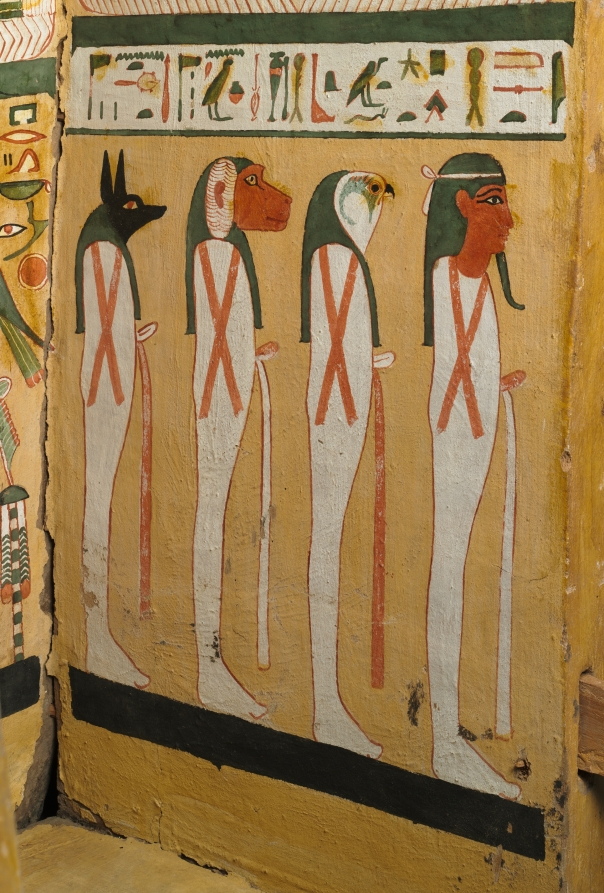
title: Coffin of Bakenmut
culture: Egypt, Thebes, Third Intermediate (1069–715 BCE), Dynasties 21–22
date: c. 1000–900 BCE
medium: gessoed and painted sycamore fig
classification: Funerary Equipment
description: The coffin of Bakenmut is one of the finest examples of painted wooden coffins made for the priests of Amen and their families at Thebes during Dynasty 21 and early Dynasty 22. The pharaohs of this time were no longer buried in the Valley of the Kings, but instead built tombs in the Delta, far to the north, where they resided. Security was lax in the Theban necropolis. The coffins and funerary goods of the wealthy citizens of Thebes were placed in unmarked and undecorated family tombs cut into the cliffs on the west bank of the Nile. All the care and detail that in more prosperous times were devoted to the decoration of the tomb chapel were now lavished on the elaborately painted coffins. Every available surface is crowded with religious scenes, images of funerary gods and goddesses, protective spells, and magical symbols. The deceased appears mummiform. An elaborate floral collar entirely covers the upper body, exposing only the separately attached hands (now lost). A pair of red "mummy braces" are crossed over the chest, their point of intersection marked by a winged sun disk. The lower body is covered with tiny figures modeled in gesso against a yellow background, which gives the effect of gold inlaid with glass or semiprecious stone. The decoration on the interior features two deified dead kings of Dynasty 18. Although these rulers had lived centuries before, memory of their greatness was still very much alive. The main scene near the top depicts Tuthmosis III, the great military pharaoh, who lived 500 years before Bakenmut. Posed as a mummy, the ruler wears a brilliant feathered garment enfolding him with falcon’s wings. The scene below features back-to-back seated images of Amenhotep I, regarded as the patron of the Theban cemetery and worshiped as a local god there.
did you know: Originally another smaller coffin was placed inside this outer coffin and in that the deceased with a mummy board would have rested.